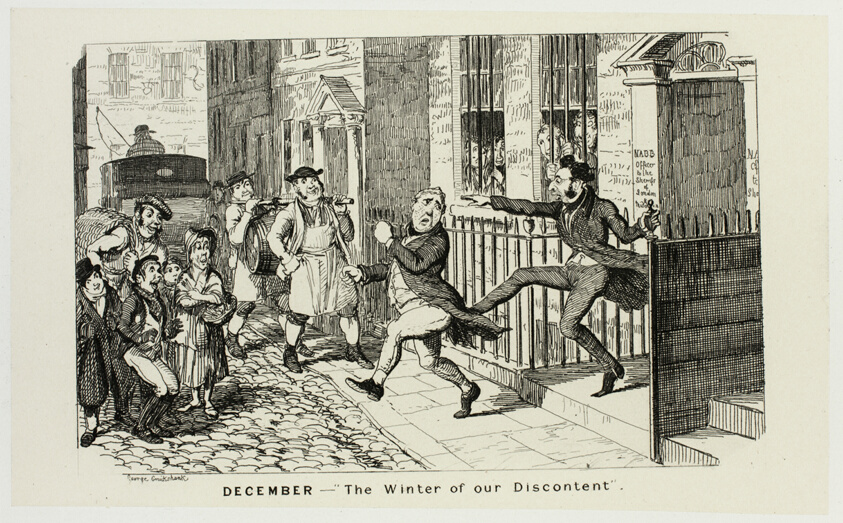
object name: Print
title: December - "The Winter of Our Discontent" from George Cruikshank's Steel Etchings to The Comic Almanacks: 1835-1853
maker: George Cruikshank (English, 1792-1878); published by Pickering & Chatto (English, 19th century)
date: 1839, printed c. 1880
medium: Steel etching in black on cream India paper, laid down on off-white card (chine collé)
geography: England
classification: etching; paper; steel; print; prints and drawing